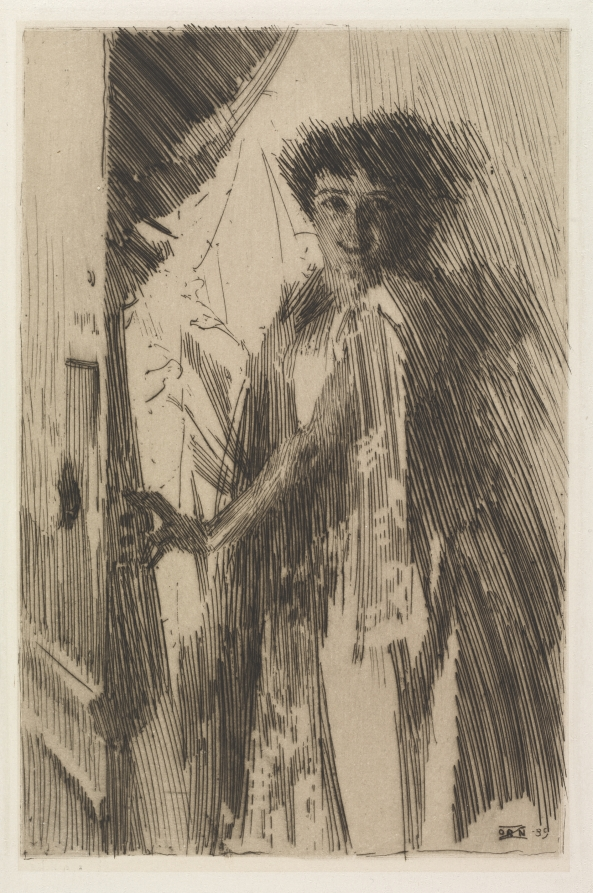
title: Rosita Mauri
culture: Sweden, 19th century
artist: Anders Zorn (Swedish, 1860–1920)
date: 1889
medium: etching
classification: Print